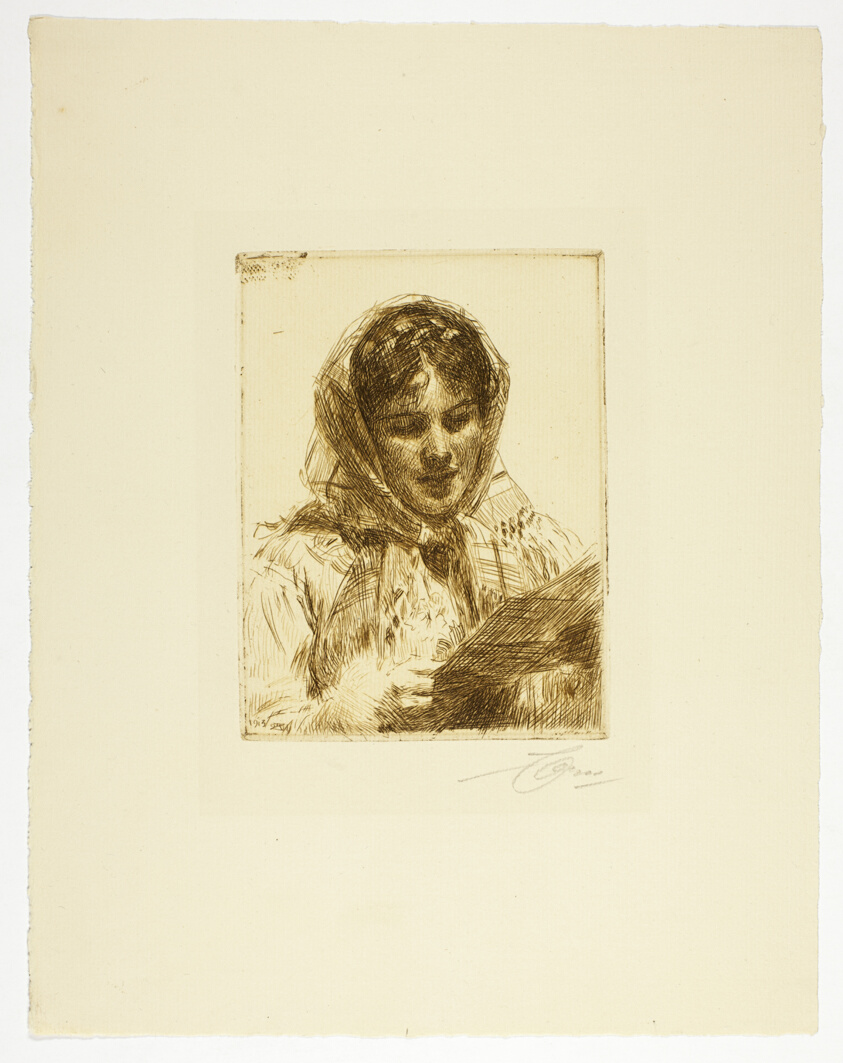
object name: Print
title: The Letter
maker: Anders Zorn (Swedish, 1860-1920)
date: 1913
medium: Etching in black on ivory laid paper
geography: Sweden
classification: etching; paper; print; prints and drawing